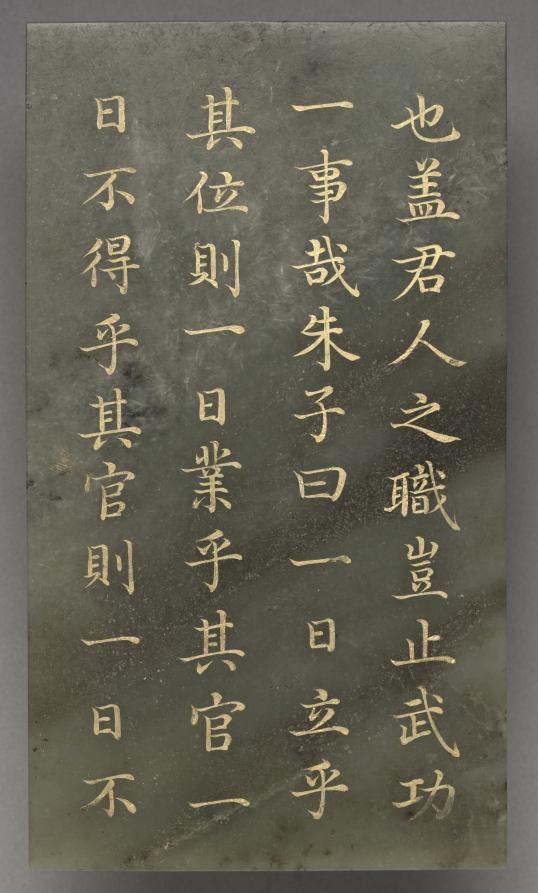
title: Tablet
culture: China, Qing dynasty (1644–1911), Qianlong reign (1736–95)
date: 1778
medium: jade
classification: Jade